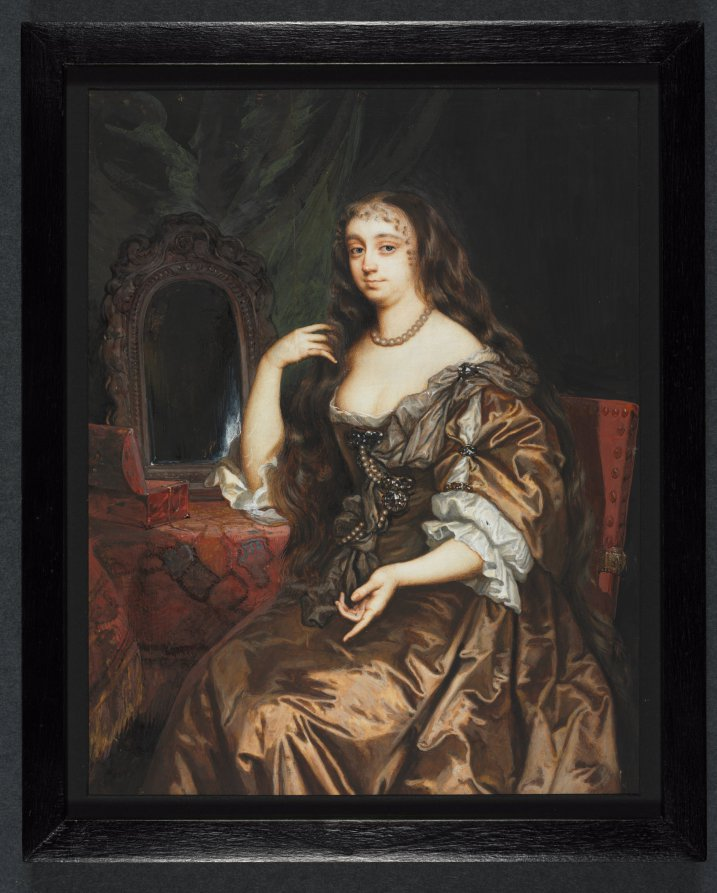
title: Portrait of Anne Hyde, Duchess of York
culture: England, 17th century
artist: Nicholas Dixon (British, c. 1708)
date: c. 1662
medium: watercolor on vellum in a large wooden frame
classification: Portrait Miniature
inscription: Label inside of back: Henry J. Murcott, London. Written in ink on backing: "Anny Hyde, first Wife of James II, Mother of Queen Mary II, Queen Anne. From Lord Currie's collection."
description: Though knowledge about his birth and training remain obscure, Nicholas Dixon is known to have been a favorite miniature painter of the English court at the close of the seventeenth century. He succeeded Samuel Cooper (1608/9–1672) as limner to King Charles II in 1673 and was Keeper of the King’s Picture Closet, for which he was granted an irregularly paid annuity of £200. Dixon painted a substantial number of ambitiously scaled miniatures—which became increasingly uncommon among practitioners of the art form when the more constrictive support of ivory supplanted vellum in the early 1700s. Dixon often signed his work with the monogram ND, and many of his large cabinet miniatures were copies of portraits, religious scenes, and mythological paintings by old masters, thirty of which formed part of the collection of the dukes of Portland. Among the characteristics of his style are ruddy flesh tones and drowsy eyes, and like the work of John Hoskins (c. 1590–1665), who may have been his teacher, Dixon favored softer modeling and diffuse lighting of his subjects, as opposed to the dramatic shadows employed by Cooper. Two lottery schemes—one in 1684/85 and the other in 1698— involving the exhibition of miniatures and the distribution of cash prizes proved disastrous for Dixon, who was in financial ruin by 1700 and constrained to sell a large number of works from the lottery. Anne Hyde (1637–1671), the sitter in this portrait, was around the age of twenty-four when the miniature was painted. She faces right and sits upon a dull red chair before a dressing table covered with a deep red embroidered cloth or tapestry that is fringed at the edges. A mirror and open jewel box lie on a table that is in front of a dark green curtain. The sitter has gray eyes and wears a golden brown satin décolleté dress with white ruffled undersleeves ornamented with jeweled closures. A necklace of large pearls hangs around her neck, and jeweled brooches fasten a winding rope of pearls to the bodice of her gown. Her right elbow rests on the table, and her fingertips comb through her long, wavy brown hair, which falls over her shoulders to below her waist. Her left arm extends toward her knee as she lightly holds a measure of her sash under her thumb while pointing downward with her index finger. The gracefully arranged, tapered fingers indicate Restoration court refinement.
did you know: This portrait is after a well-known and frequently copied oil painting by Peter Lely; it is nearly identical but with crimson and gold drapery in place of the dressing table and mirror.